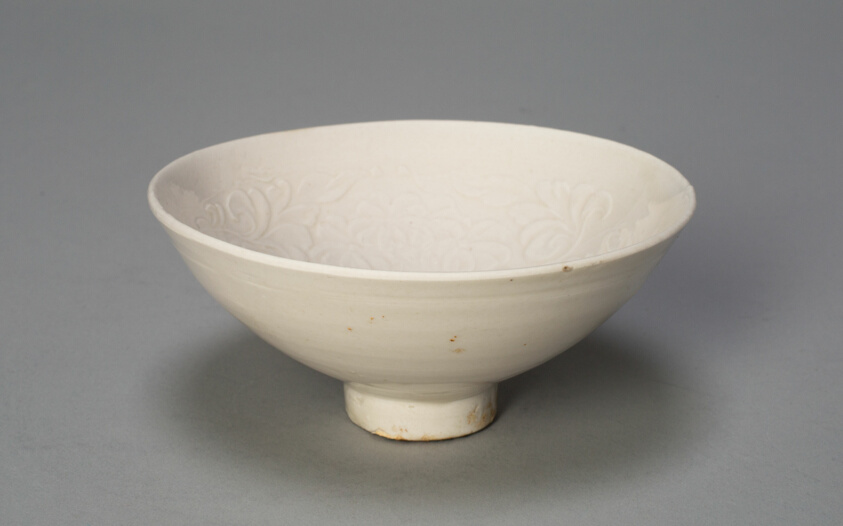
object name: Vessel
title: Conical Bowl with Peonies and Leaves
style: Chinese (culture or style), ding, East Asian, asian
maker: China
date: Song dynasty (960–1279)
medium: Ding ware; porcelain with underglaze molded decoration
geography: China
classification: bowl; porcelain; dish (vessel); asian art; ceramics; vessel